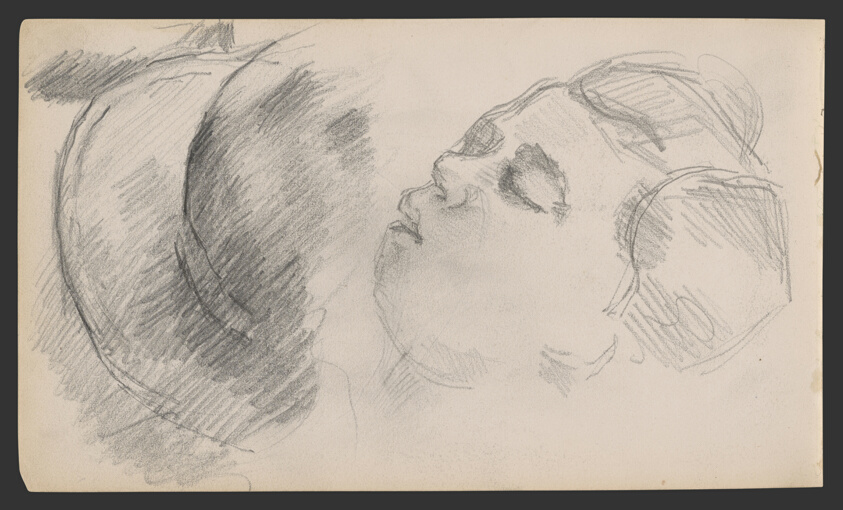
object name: Drawing and Watercolor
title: Sketchbook No. 2 (L'Estaque)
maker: Paul Cézanne; French, 1839-1906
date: 1875–86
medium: Graphite and pen and ink drawings on paper, bound into a book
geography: France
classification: sketchbook; graphite; prints and drawing; paper